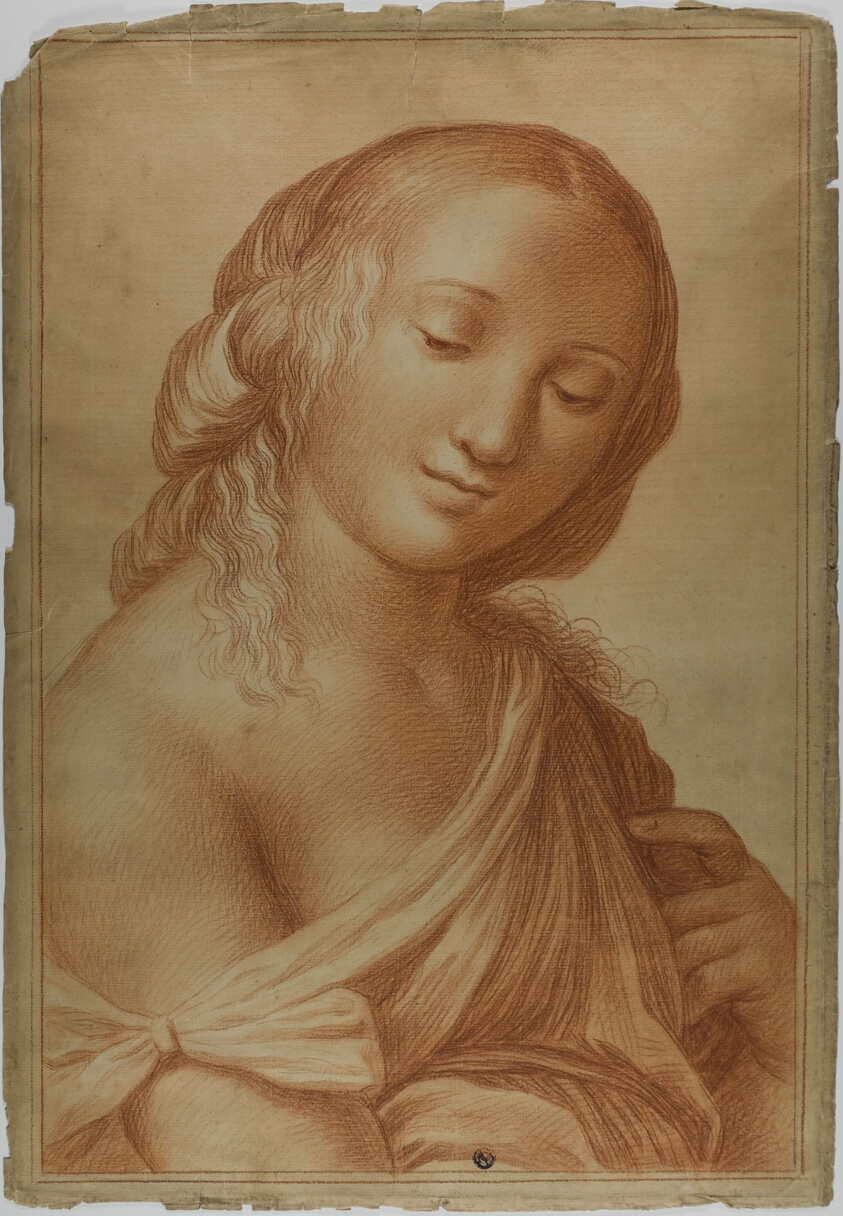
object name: Drawing and Watercolor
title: Muse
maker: After Raffaello Sanzio, called Raphael; Italian, 1483-1520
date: 18th century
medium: Red chalk with stumping, and touches of red chalk wash, on cream laid paper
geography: Italy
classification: chalk; drawings (visual works); prints and drawing